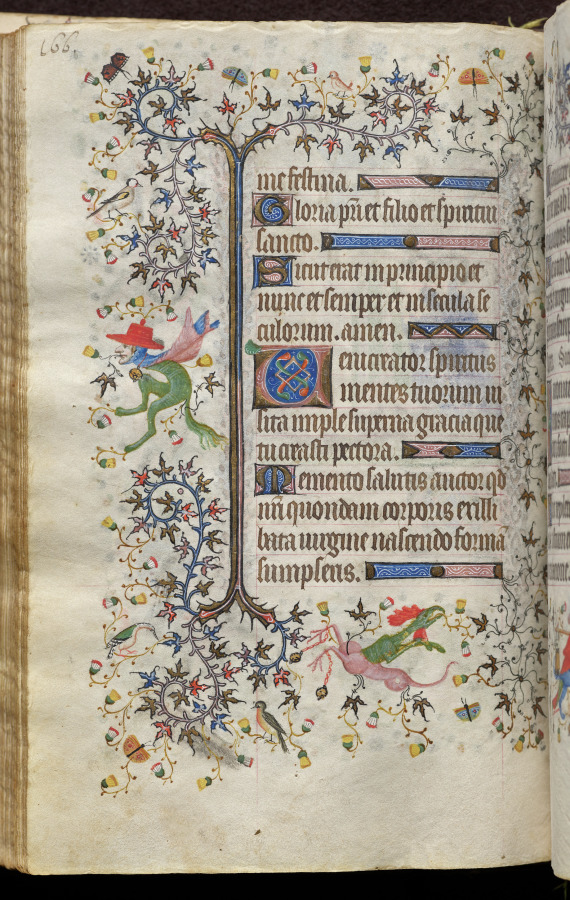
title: Hours of Charles the Noble, King of Navarre (1361-1425): fol. 83v, Text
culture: France, Paris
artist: Master of the Brussels Initials and Associates (French)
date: c. 1405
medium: ink, tempera, and gold on vellum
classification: Bound Volume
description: This precious volume was obviously highly prized by its owner, the French-born King of Navarre, who had his coat of arms painted on no less than twenty folios. Rather than directly commissioning this manuscript from a specific workshop, it seems that Charles the Noble acquired his book of hours -- perhaps ready-made for the luxury market -- while on a trip to Paris in 1404-05. A collaborative effort, six painting styles are evidenced within the pages of this codex, those of two Italians, two Frenchmen, and two Netherlanders. The painter who was responsible for the planning and decoration of the book, and who produced seventeen of the large miniatures, was a Bolognese artist known as the Master of the Brussels Initials. His principal assistant, responsible for most of the borders, was a Florentine who signed his name "Zecho" da Firenze on folio 208 verso.